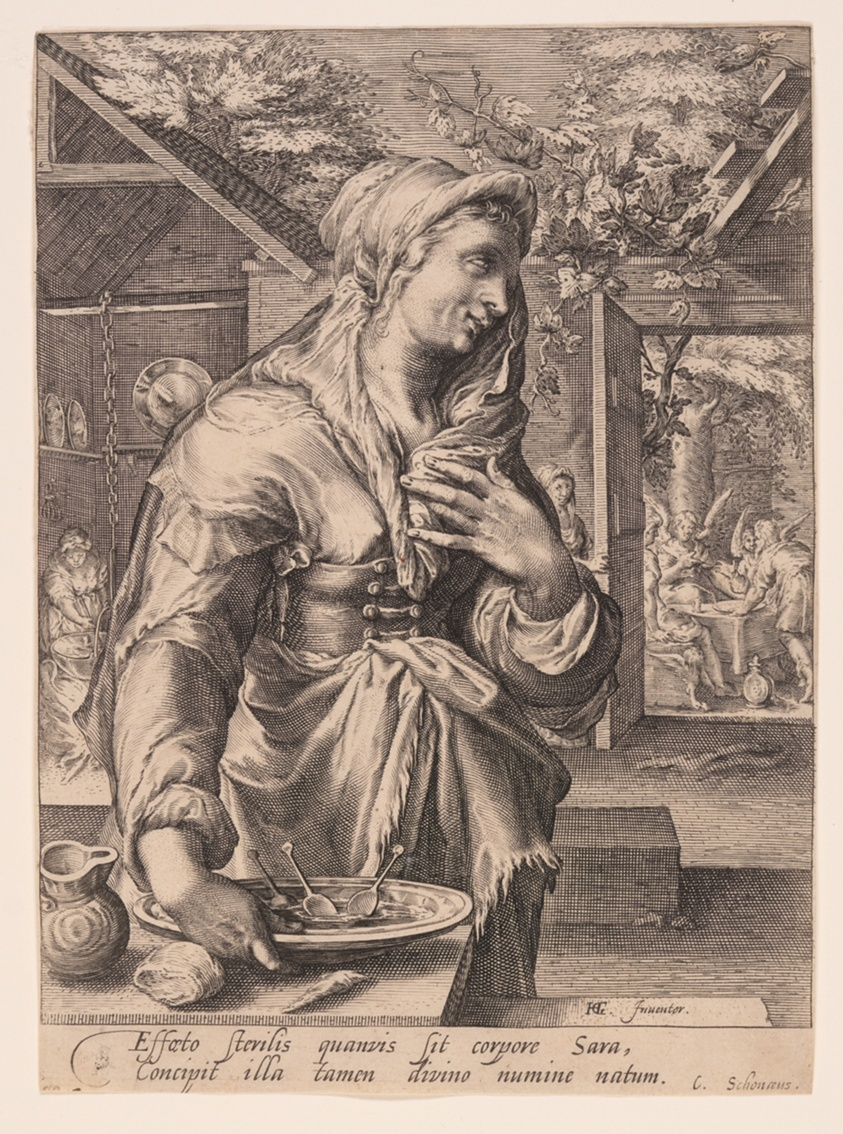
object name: Print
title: Sarah, from The Wives of the Patriarchs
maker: Jacob Matham (Dutch, 1571–1631); after Hendrick Goltzius (Dutch, 1558–1617)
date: 1597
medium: Engraving on laid paper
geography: Netherlands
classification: print; engraving; paper; prints and drawing